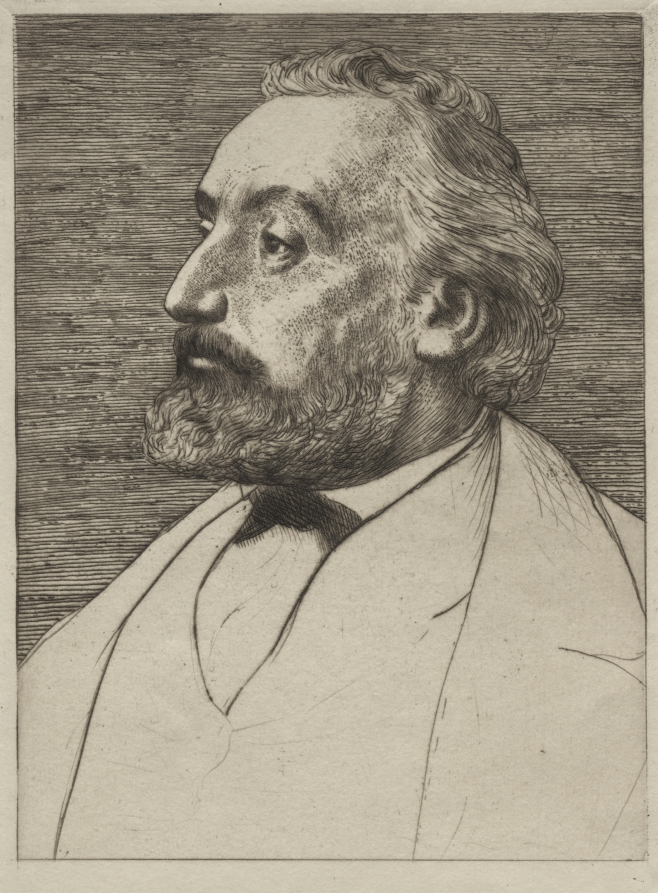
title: Léon Gambetta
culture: France, 19th century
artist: Alphonse Legros (French, 1837–1911)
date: c. 1857–1911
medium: etching and drypoint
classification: Print